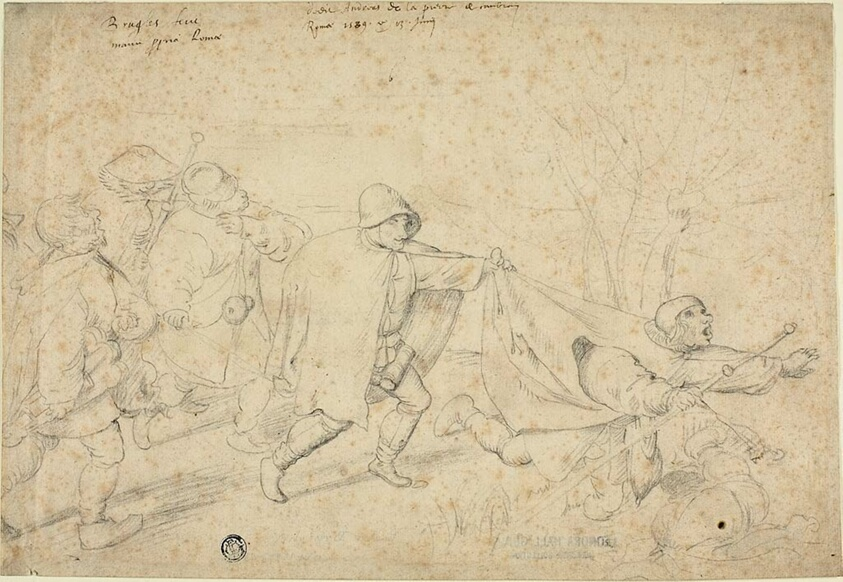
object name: Drawing and Watercolor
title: The Parable of the Blind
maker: Andreas de la Prieur de Cambray (Flemish, 1567-1599); after Pieter Bruegel, the Elder (Netherlandish/Flemish, 1525/30-1569); or after Marten van Cleve, the elder (Netherlandish, 1527-1581)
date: 1589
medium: Black chalk on buff laid paper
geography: Netherlands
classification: chalk; drawings (visual works); prints and drawing